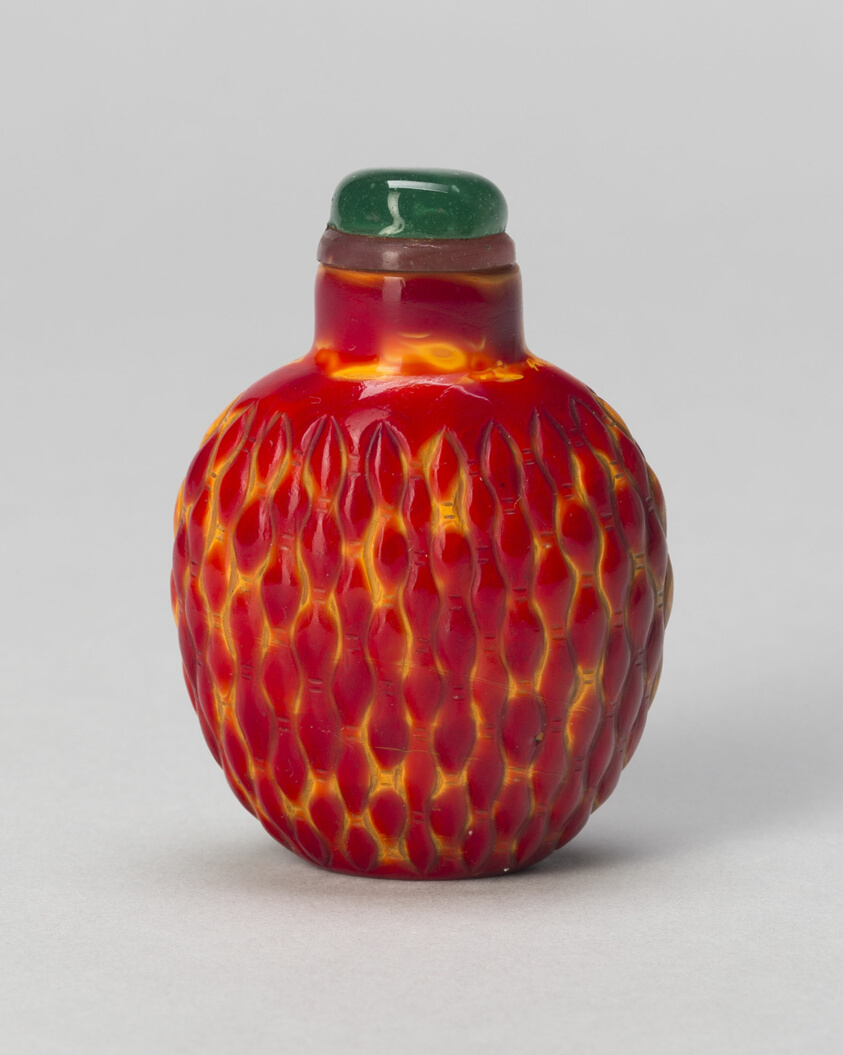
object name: Vessel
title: Spade-Shaped Snuff Bottle with Basketweave Pattern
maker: China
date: Qing dynasty (1644–1911), 1730–1800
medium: Glass in imitation of realgar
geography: China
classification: snuff bottle; asian art; vessel